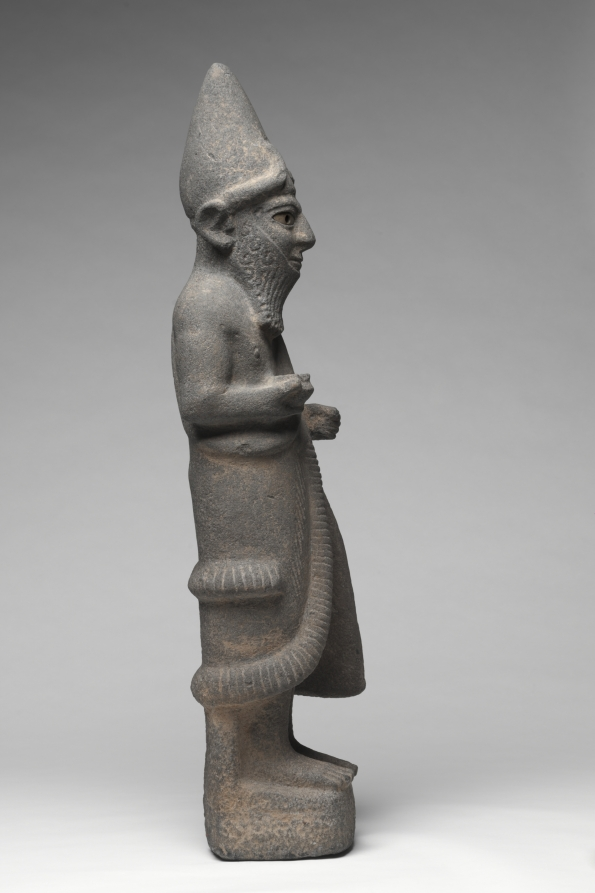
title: Priest-King or Deity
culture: Hittite, North Syria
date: c. 1600 BCE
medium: basalt with bone eyes (left, ancient; right, restored)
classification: Sculpture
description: The Hittites migrated into Anatolia in the 3rd millennium BCE and spoke an Indo-European language, a group that includes Greek, Latin, Persian, Sanskrit, English, and most modern European languages. They were the first ancient people to use iron for weapons. From about 1600–1200 BCE their empire was at its peak, extending from central Anatolia to Syria, and south along the eastern Mediterranean. Their vast empire and interest in commerce enabled the Hittites to spread Mesopotamian ideas and culture throughout the ancient Mediterranean world. This large basalt sculpture is exceptionally rare in depicting a Hittite god or priest-king wearing a horned conical crown, false beard, and long robe. He holds a bowl in his right hand and once held something in his left, perhaps a staff or sword.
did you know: The left eye of the sculpture is the original bone inlay while the right eye is a modern restoration done after the piece was damaged.